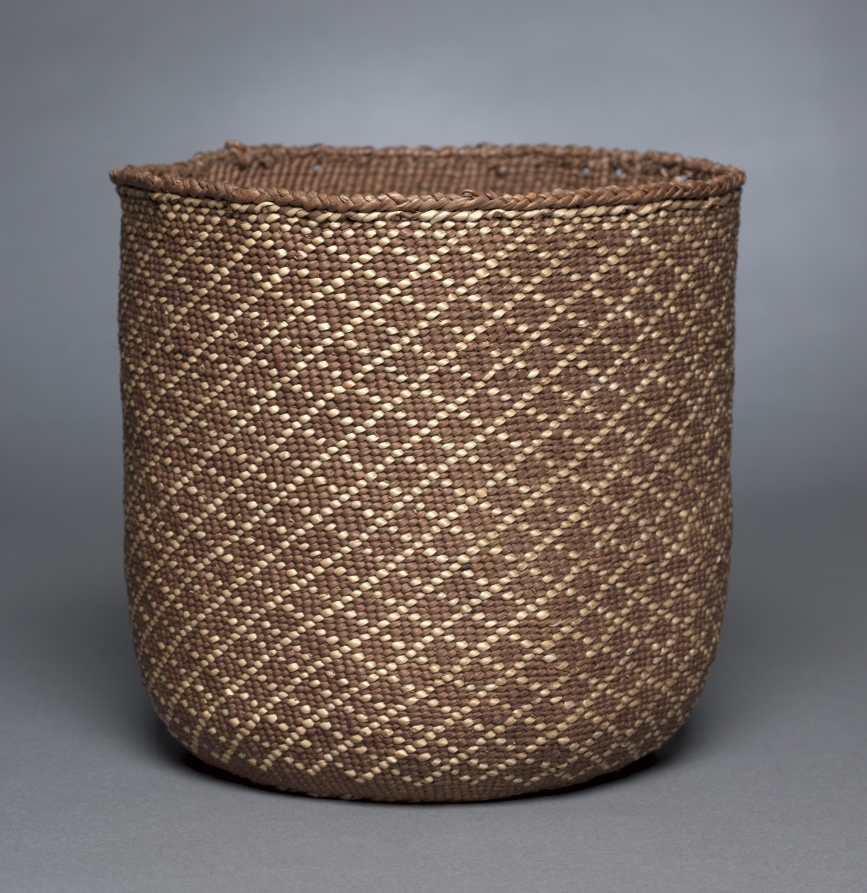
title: Storage Bowl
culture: Northwest Coast, Quinalt, Salish, Unassigned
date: Unassigned, before 1929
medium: Beargrass, Cedar root; woven, 1/2 twist overlay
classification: Basketry